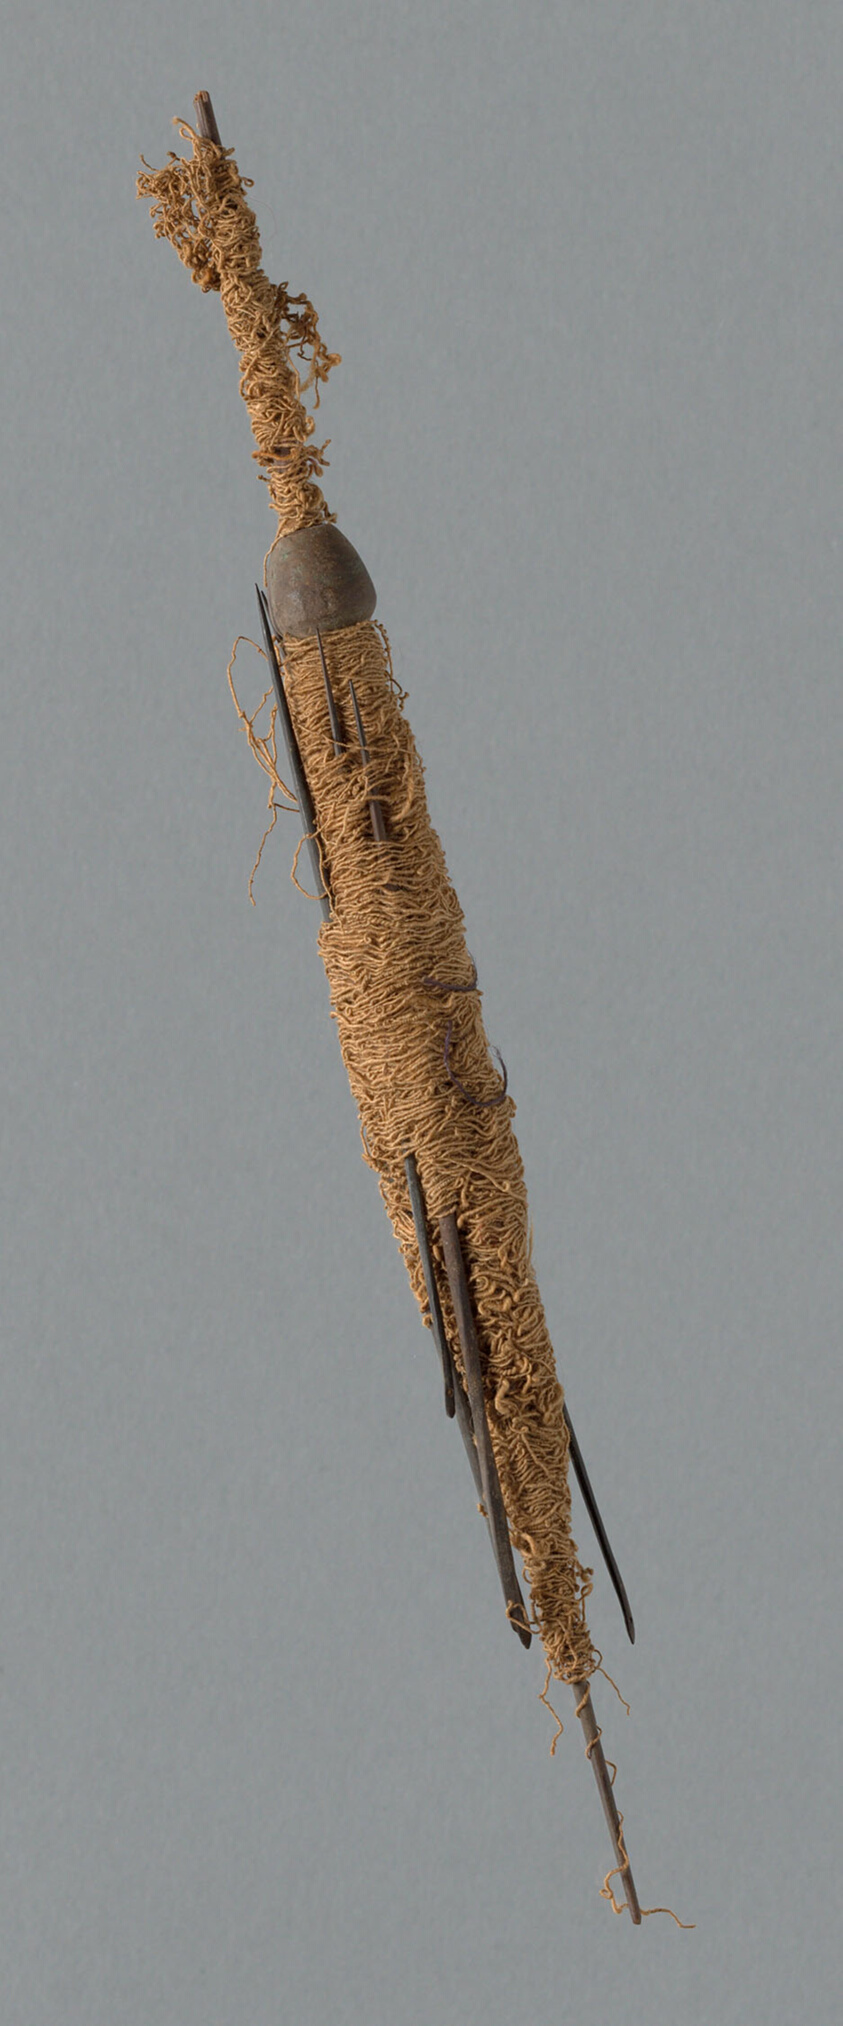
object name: non-art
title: Wooden Spindle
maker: Peru, Possibly central coast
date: 1000/1476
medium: Wood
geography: Peru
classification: spindles (textile working equipment); textile working equipment; accessories (object genre); textile